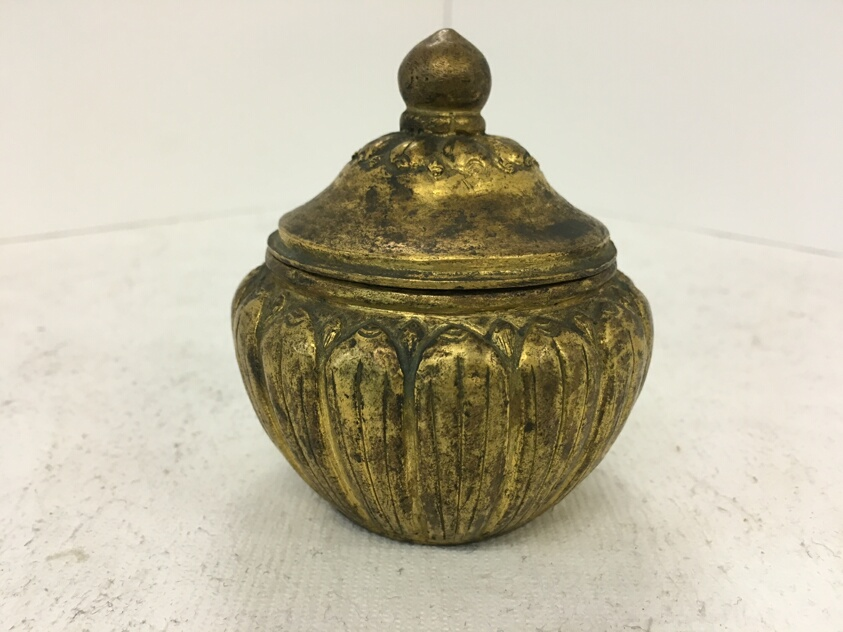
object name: Vessel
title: Ointment Jar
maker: China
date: Five dynasties (907CE-960CE)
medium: Bronze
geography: China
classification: bronze; metal; container; asian art